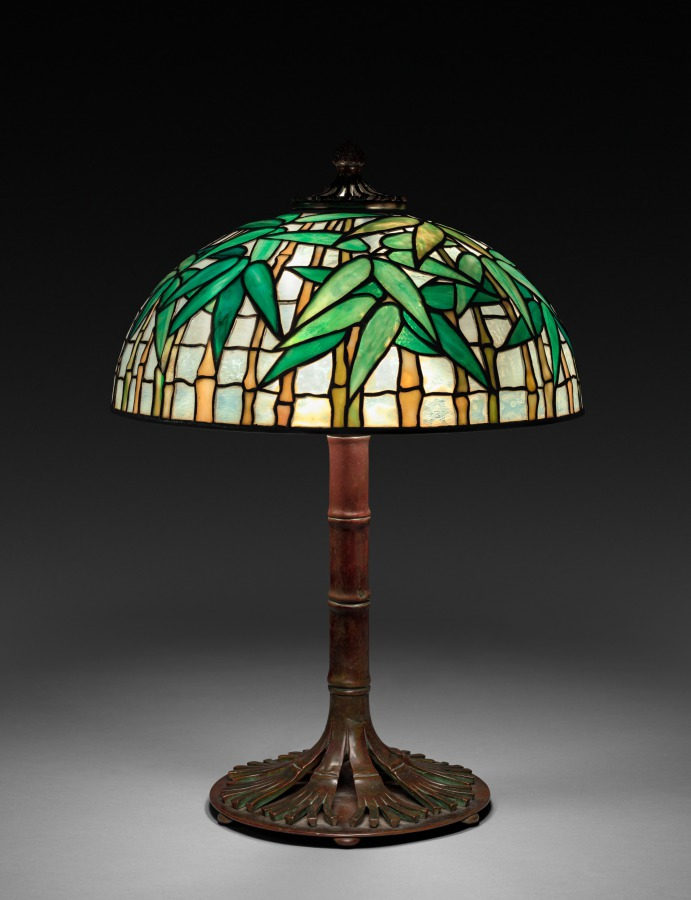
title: Bamboo Table Lamp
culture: America, New York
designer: possibly by Clara Wolcott Driscoll (American, 1861–1944)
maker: Tiffany Studios (United States, New York, 1902–32)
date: c. 1902–10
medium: Leaded glass, bronze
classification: Lamp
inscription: Shade impressed: TIFFANY STUDIOS NEW YORK 1443-14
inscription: Base impressed: TIFFANY STUDIOS/NEW YORK/480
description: Louis Comfort Tiffany was among those who championed lush, sometimes wild-looking displays of varied species in the garden at his Long Island estate, Laurelton Hall. He encouraged his designers to take inspiration from his garden by shipping fresh cuttings almost weekly to his studios. Ohio native Clara Wolcott Driscoll and her team of female designers created floral and leafy patterns for lamps and mosaics that became among the most sought after and commercially successful of Tiffany’s production.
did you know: Although many of Louis Comfort Tiffany's lamp shades were interchangeable with different bases, this bamboo shade was made to match its bamboo style base.